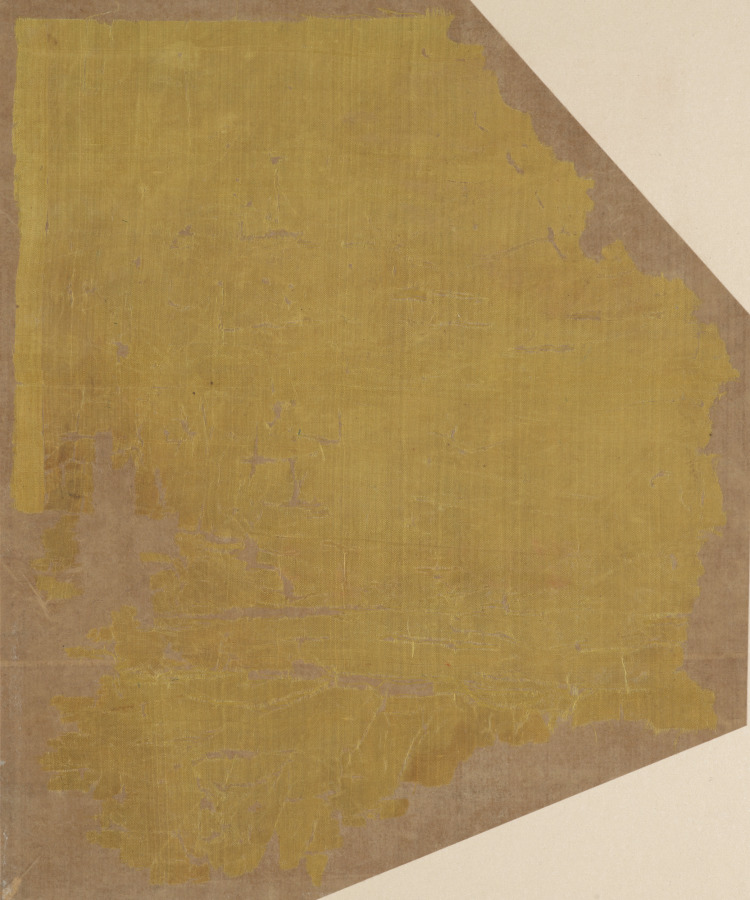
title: Fragment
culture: China or Japan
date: 700s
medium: tabby weave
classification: Textile